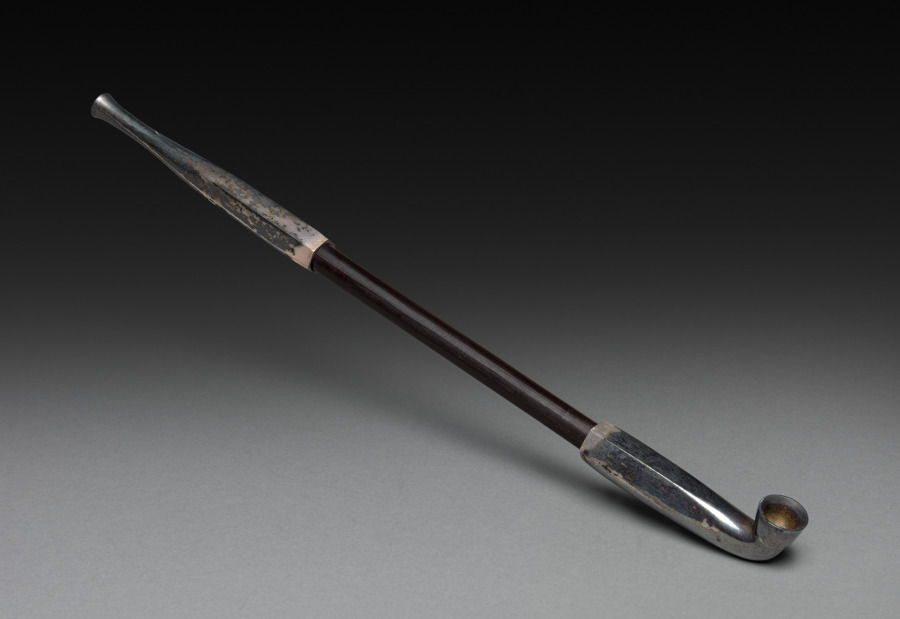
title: Tobacco Pipe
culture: Japan, Edo period (1615–1868)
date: 1700s to mid-1800s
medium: wood and silver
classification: Miscellaneous